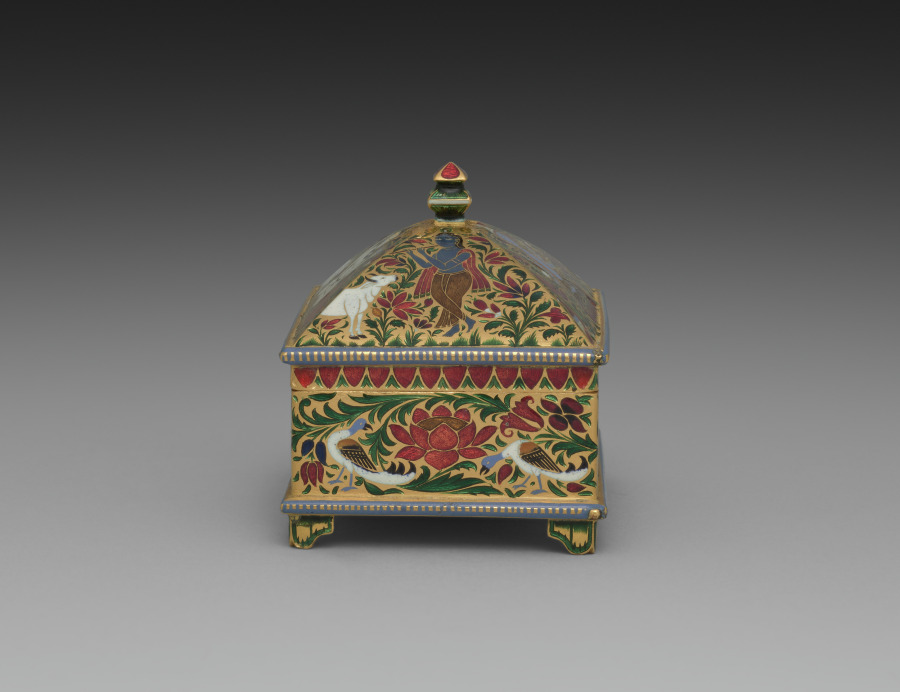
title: Box decorated with Shiva, Vishnu, Krishna, and Ganesha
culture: Northwestern India, Rajasthan, Rajput Kingdom of Jaipur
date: c. 1800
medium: gold with enamel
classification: Metalwork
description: This box is covered in a variety of birds, animals, and plants. The central motifs on the lids include images of four Hindu gods: Shiva, Krishna, Vishnu, and Ganesha. The blue figures are Vishnu and Krishna, the latter of which is an incarnation of the former who is shown playing a flute. The elephant-headed Ganesha is red and accompanied by his mount, the bandicoot rat Dinka. The four-armed Shiva is paired with two animals, including a tiger and his sacred bull mount Nandi. Small enamel boxes could be used to house many different substances, from cosmetics to spices to stimulants, including opium and paan, a digestive typically given at formal gatherings as a sign of the host’s hospitality.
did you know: Shiva’s mount is the bull; the tiger is the mount of his wife.